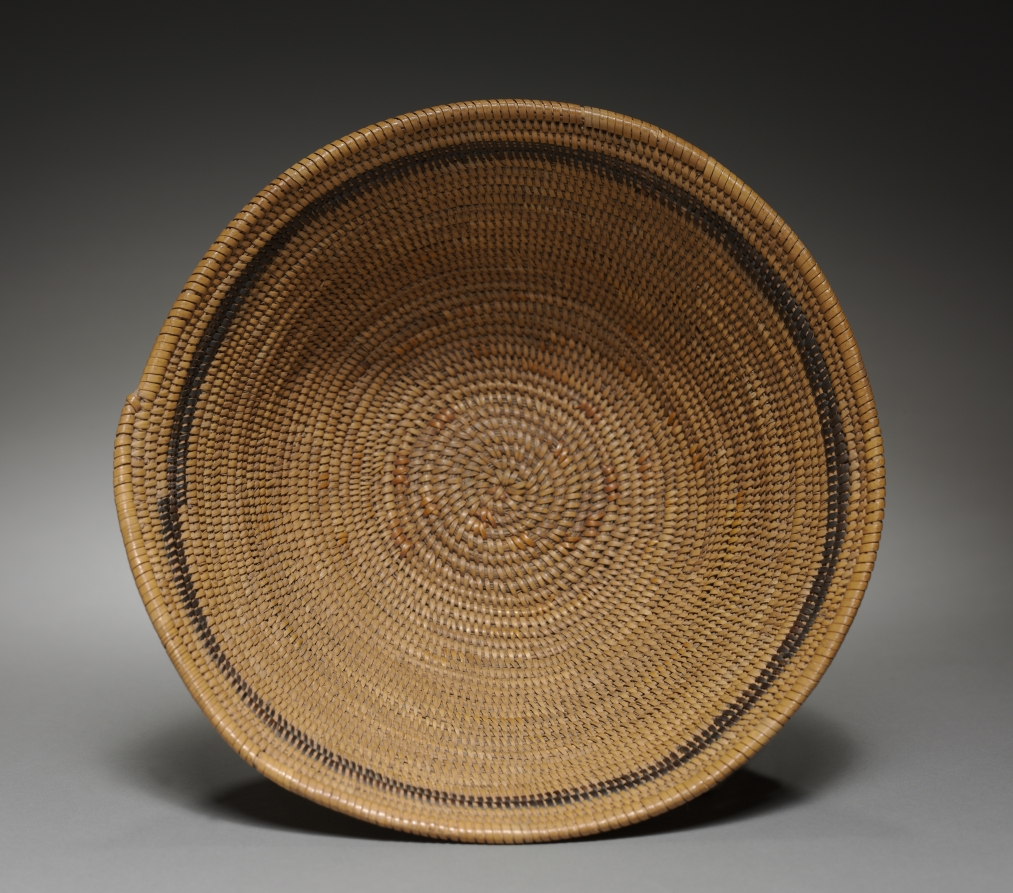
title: Hat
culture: California, Southern, Late 19th- Early 20th century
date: c 1875– 1925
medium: Juncus, Sumac; Coiled; Deergrass foundation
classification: Basketry